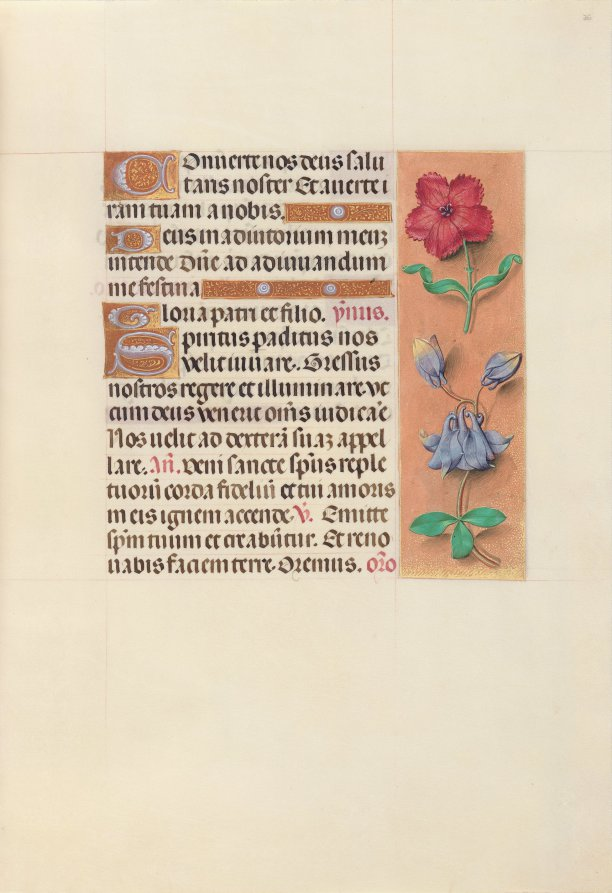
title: Hours of Queen Isabella the Catholic, Queen of Spain: Fol. 36r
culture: Flanders, Ghent and Bruges, late 15th century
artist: Master of the First Prayerbook of Maximillian (Flemish, c. 1444–1519)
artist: and Associates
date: c. 1500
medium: ink, tempera, and gold on vellum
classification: Bound Volume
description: This manuscript was illuminated by a circle of at least five highly organized manuscript painters active in the Flemish cities of Ghent and Bruges. The principal illuminator was Alexander Bening, who painted the majority of the book's miniatures. Manuscripts produced by this circle of artists are renowned for the decoration of their borders, which typically feature a rich variety of realistically-painted flowers, birds, and butterflies. This prayer book, called a book of hours, was intended not for a cleric, but for the private devotions of a lay person-in this case, Isabella the Catholic, Queen of Spain (1451-1504). Isabella's coat of arms embellishes the book's frontispiece. It is unlikely that the book was commissioned by the Queen herself; rather, she probably received it as a diplomatic gift from someone courting her patronage, perhaps Cardinal Francisco Jimenez de Cisneros. A Franciscan friar, Jimenez was dependent upon Isabella for his advancement, first to the post of Queen's confessor in 1492, and then to Archbishop of Toledo in 1495.